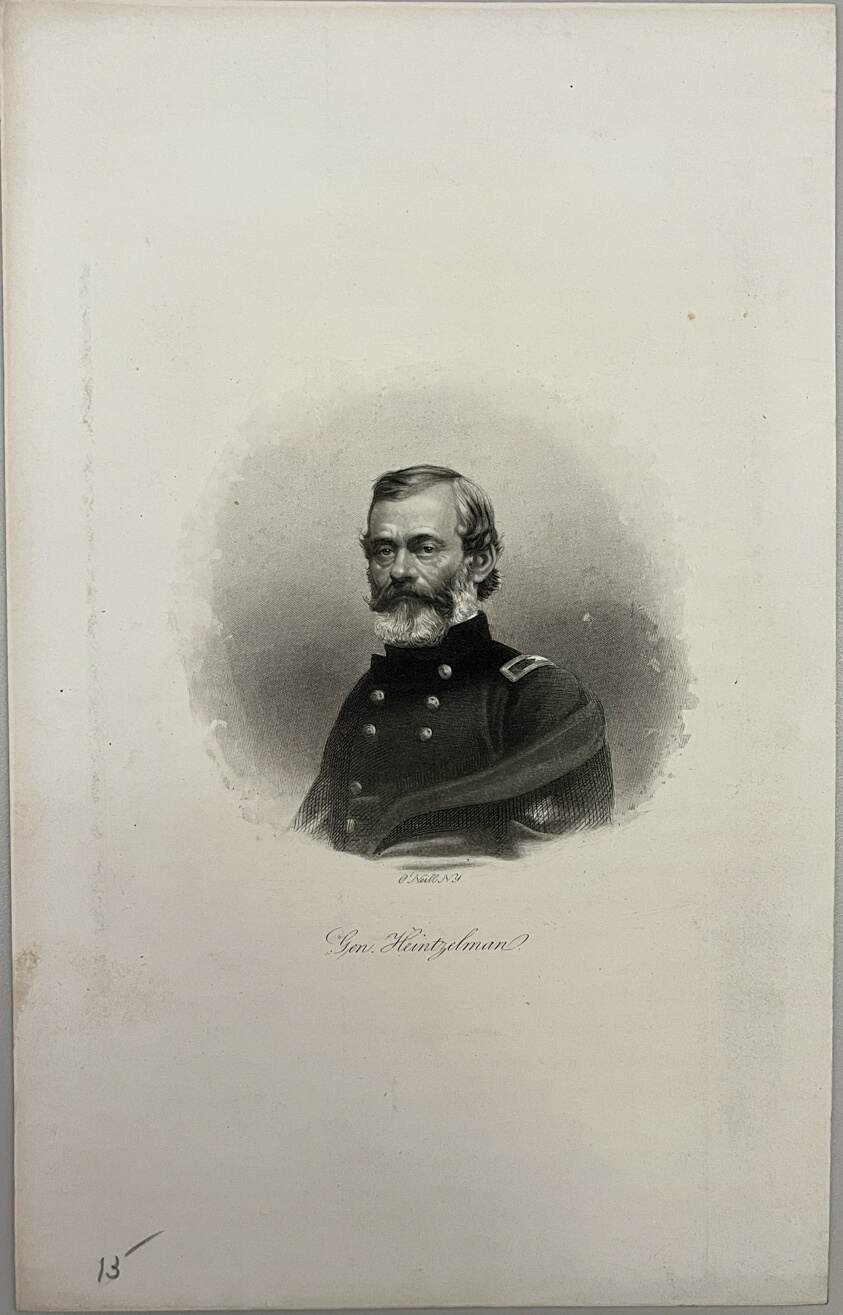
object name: Print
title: General Heintzelman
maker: Artist Unknown (Likely American, 19th century)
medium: Etching on paper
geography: United States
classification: reproduction; print; prints and drawing